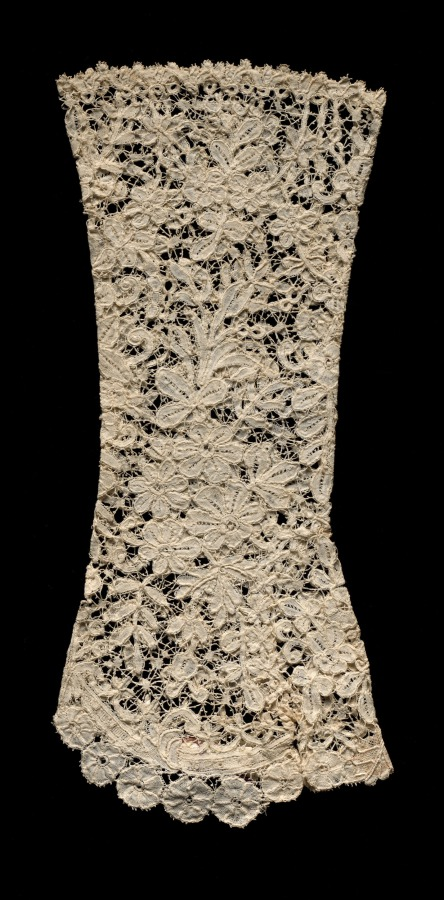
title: Glove (one of a pair)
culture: Flanders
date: c. 1850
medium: Bobbin lace (Duchese lace)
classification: Lace